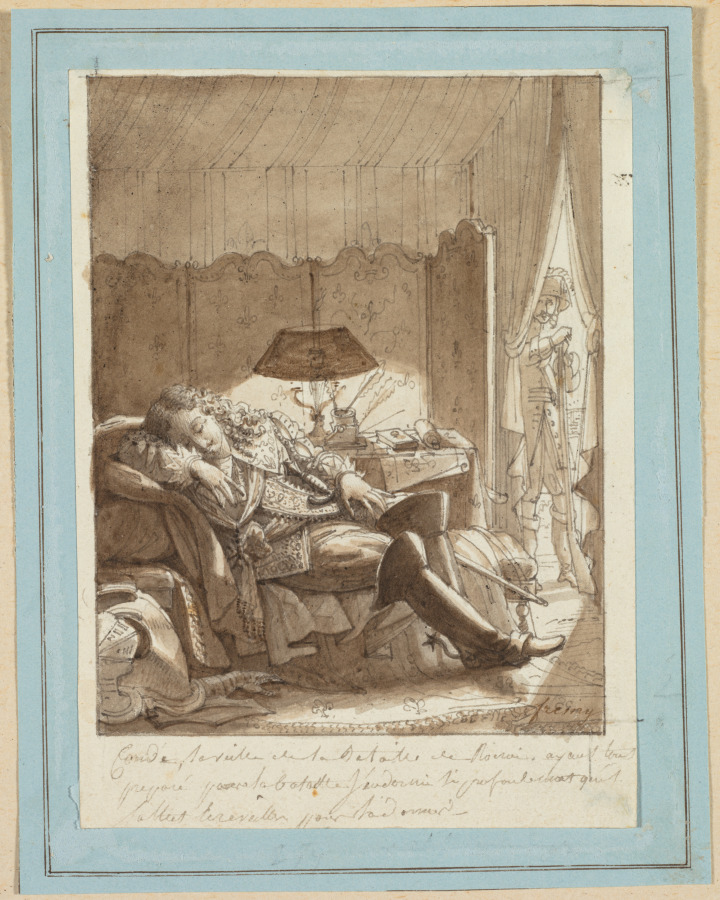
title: Le Sommeil du Grand Condé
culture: France, 19th century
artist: Jacque-Noël-Marie Frémy (French, 1782–1867)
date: c. 1817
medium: ink and watercolor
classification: Drawing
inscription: Lower right corner, within image, in brown ink: frémy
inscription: Beneath image, in gray watercolor: Condé, la vielle de la bataille de Rocroi, ayant tous préparé pour la bataille, s'endormit si profondément qu'il fallut le réveiller au moment de l'attaque (last few words indecipherable - text based on the description of the painting in the catalogue of the Salon of 1817)